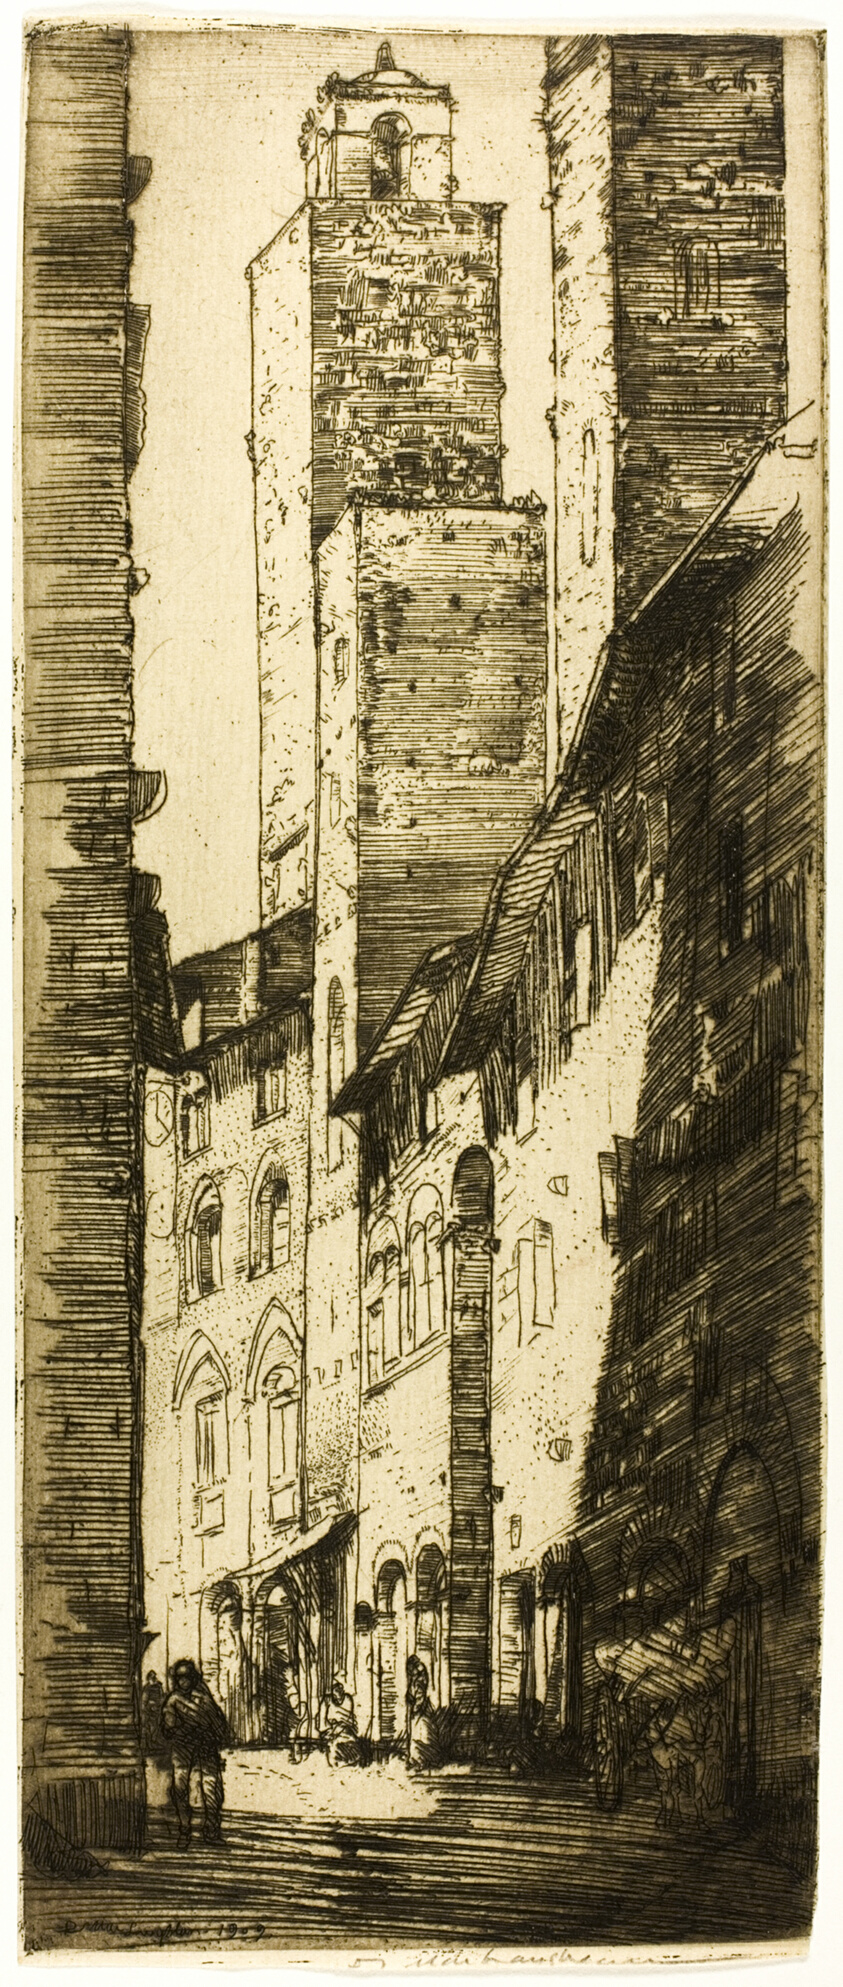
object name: Print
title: The Towers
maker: Donald Shaw MacLaughlan (American, born Canada, 1876-1938)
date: 1909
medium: Etching in brown on cream laid paper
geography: United States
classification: etching; print; prints and drawing